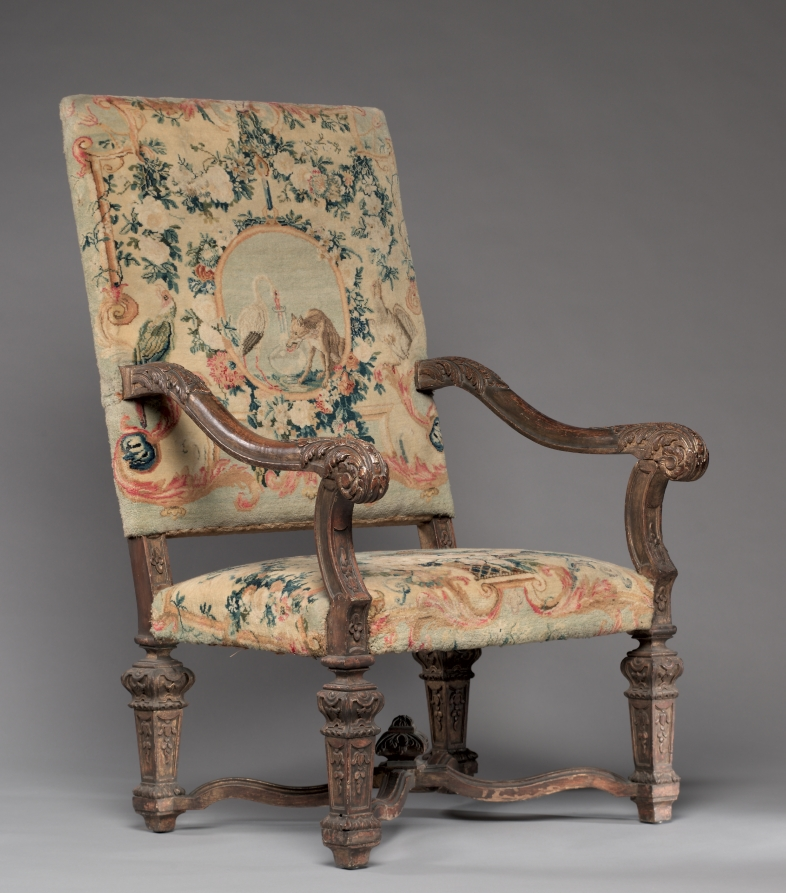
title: Armchair (4 of 4)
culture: France, 18th century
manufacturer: Royal Savonnerie Manufactory, Chaillot Workshops (French, est. 1627)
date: before 1717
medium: carved wood, Savonnerie knotted-pile (symmertrical rug knot) upholstery; wool, hemp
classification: Furniture and woodwork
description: These chairs belong to a suite that includes a settee (also in the CMA’s collection) and a tapestry made for a count and countess to mark their wedding in 1717. Furniture of this scale was usually placed against the wall in grand reception halls, more as a display of wealth than for use. Upholstered in Savonnerie tapestries, this suite was among the most treasured and expensive example anyone could own and typically reserved for royalty. To add decorative and intellectual interest to the textiles, weavers incorporated symbols depicting various stories from the Fables of Jean de La Fontaine, published from 1668 to 1694 and largely adapted from Aesop and other early storytellers.